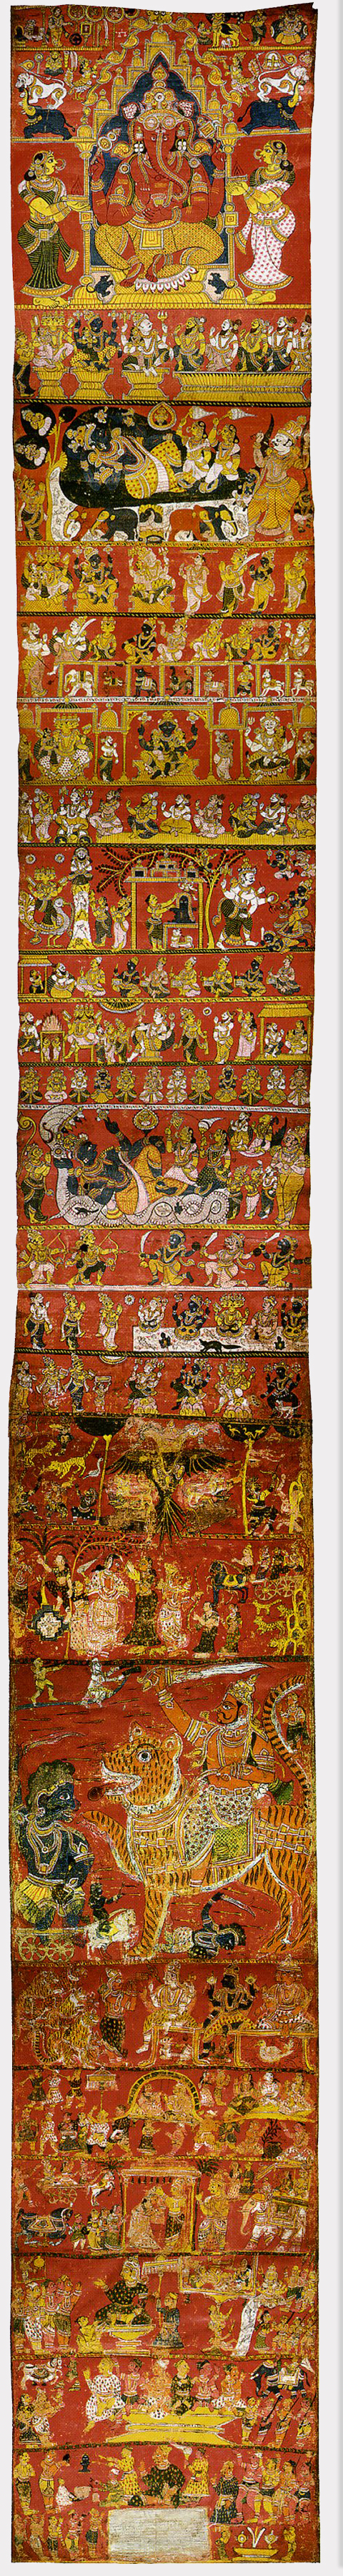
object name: Painting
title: A Narrative Scroll from Andhra Pradesh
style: South Asian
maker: India; Telangana, Warangal area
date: c. 1875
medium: Ink and pigment on cloth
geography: Andhra Pradesh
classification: ink or chalk wash; painting; asian art